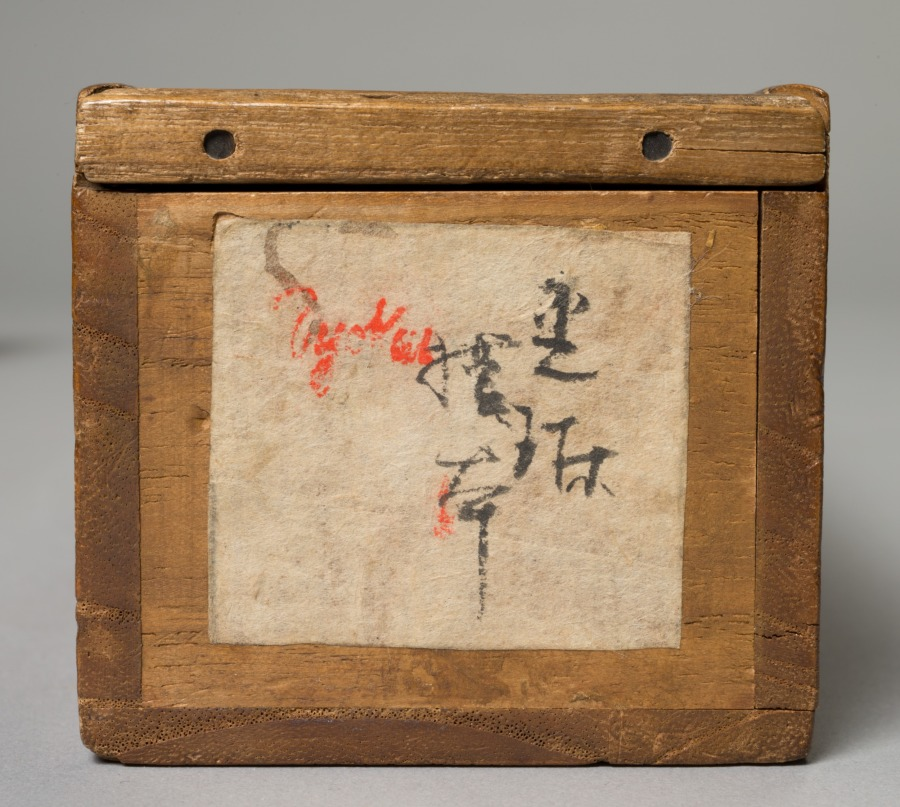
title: Pheasant and Grasses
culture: Japan, Edo period (1615–1868)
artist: attributed to Ogata Kōrin (Japanese, 1658–1716)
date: late 1600s–early 1700s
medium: hanging scroll; ink and color on paper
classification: Painting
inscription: two seals of artist, lower right.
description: Korin was a founder of the Rimpa (decorative) school of painting and was a keen observer of nature. The pheasant is often associated with autumn.